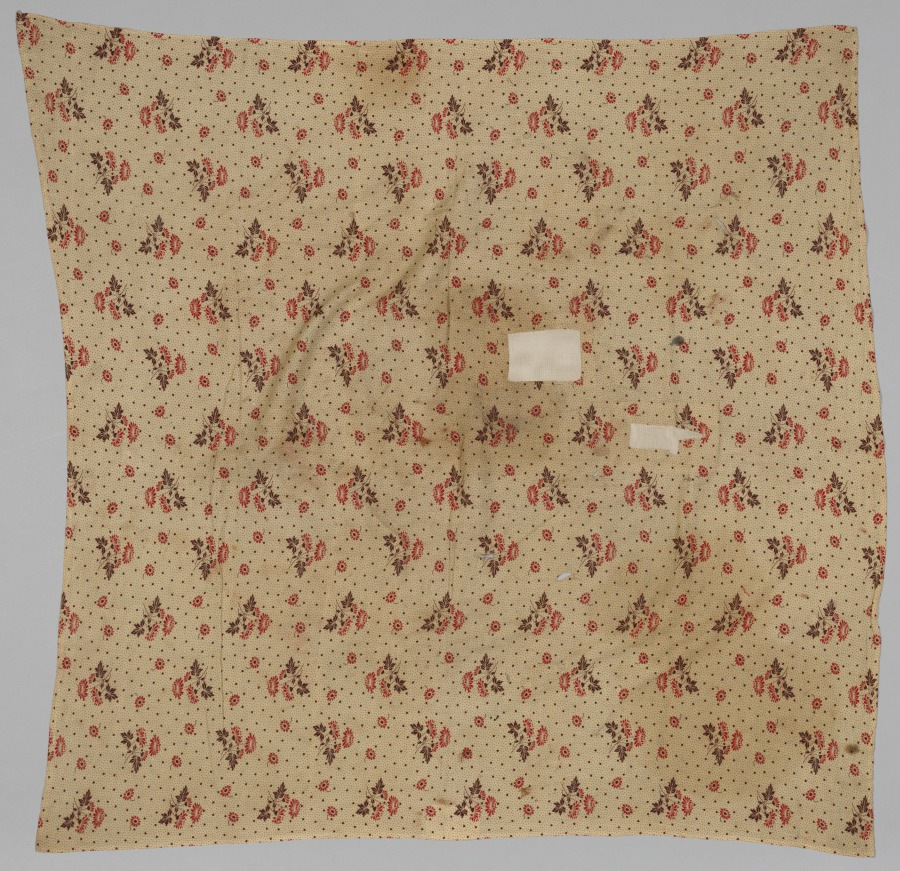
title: Wrapper (Furoshiki)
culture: Japan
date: 1800s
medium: cotton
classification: Textile